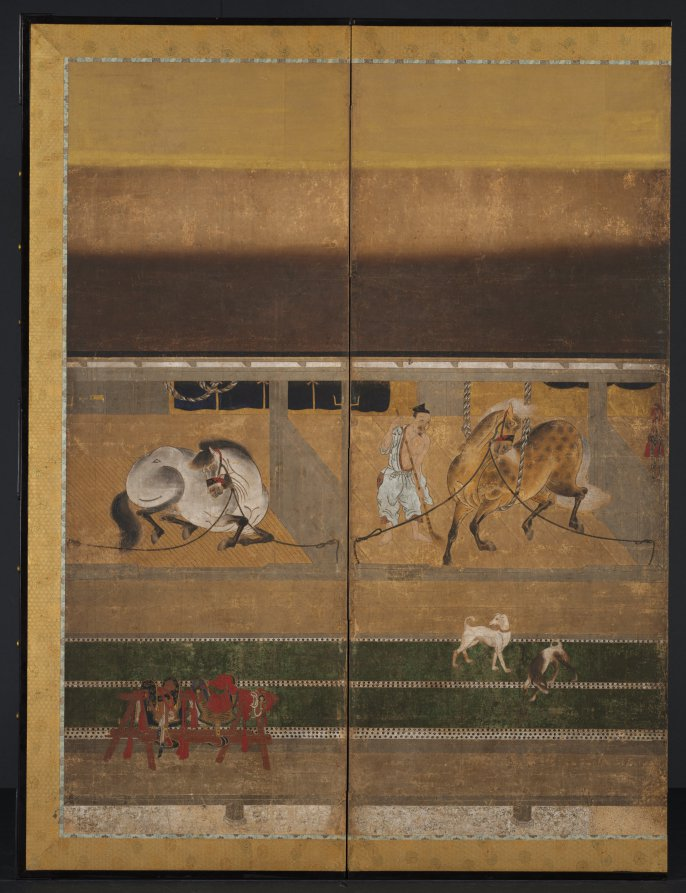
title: Horse Stable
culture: Japan, Muromachi period (1392–1573)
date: early 1500s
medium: One of a pair of six-panel folding screens; ink, color, and gold on paper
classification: Painting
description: Prized horses in stables may be the main theme of the pair of screens to which this screen belongs, but a lot of action is happening on the verandas. Here, people challenge one another at two different board games, go and shōgi. A lively atmosphere develops in the interplay of the dynamic horses and the strategic games.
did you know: Shōgi means "military leader's board game."